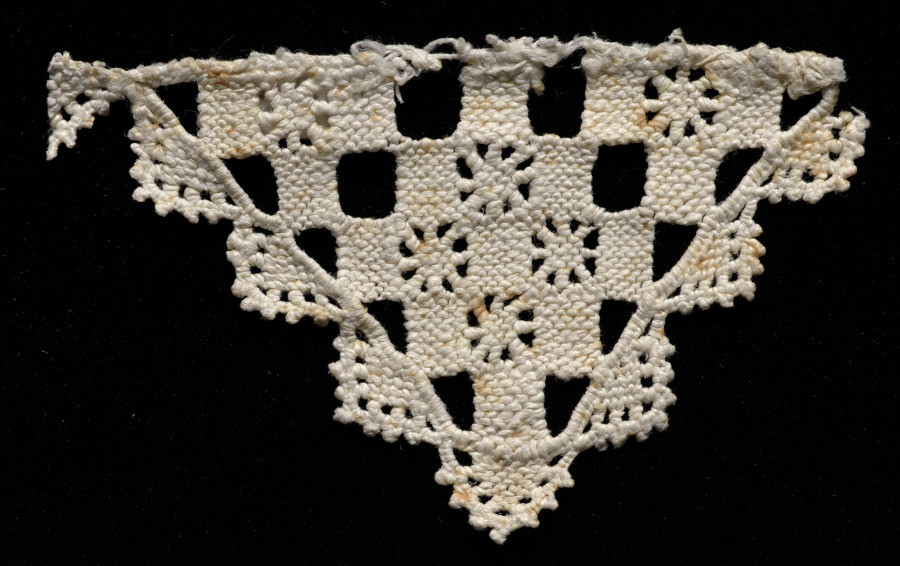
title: Lace Fragment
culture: Italy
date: 1600s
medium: Needle lace (Punto Avorio or Ivory Stitch)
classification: Lace